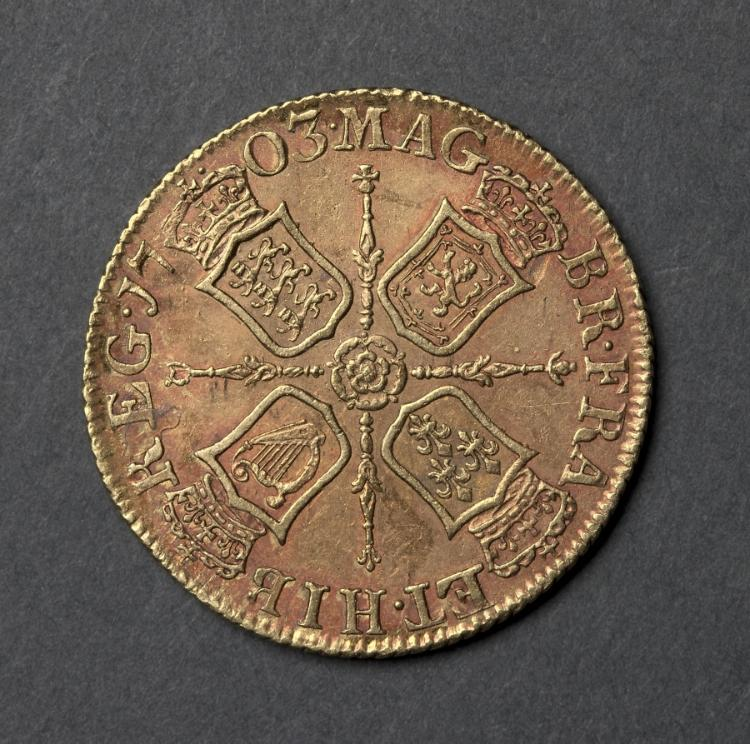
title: Guinea: Shields and rose (reverse)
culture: England, Anne, 1702-1714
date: 1703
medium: gold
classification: Coins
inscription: MAG BR. FRA ET. HIB REG 1703